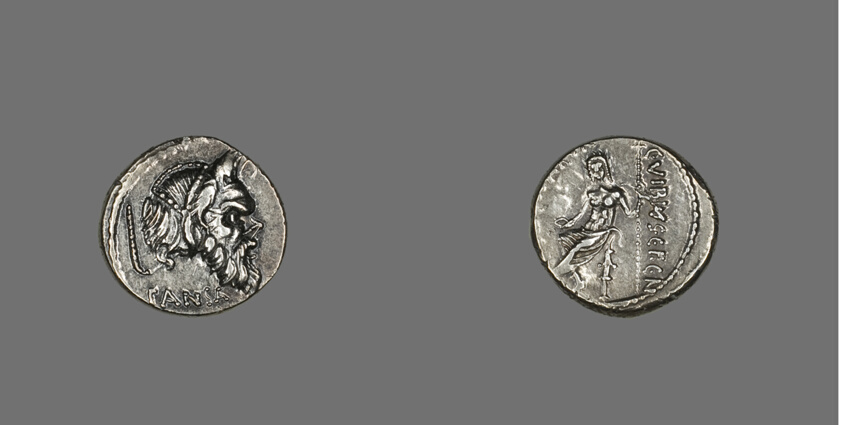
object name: Coin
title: Denarius (Coin) Depicting Mask of Pan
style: roman (ancient, style or period)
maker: Roman, minted in Rome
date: about 48 BCE, issued by C. Vibius Pansa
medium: Silver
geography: Roman Empire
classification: coin; ancient art